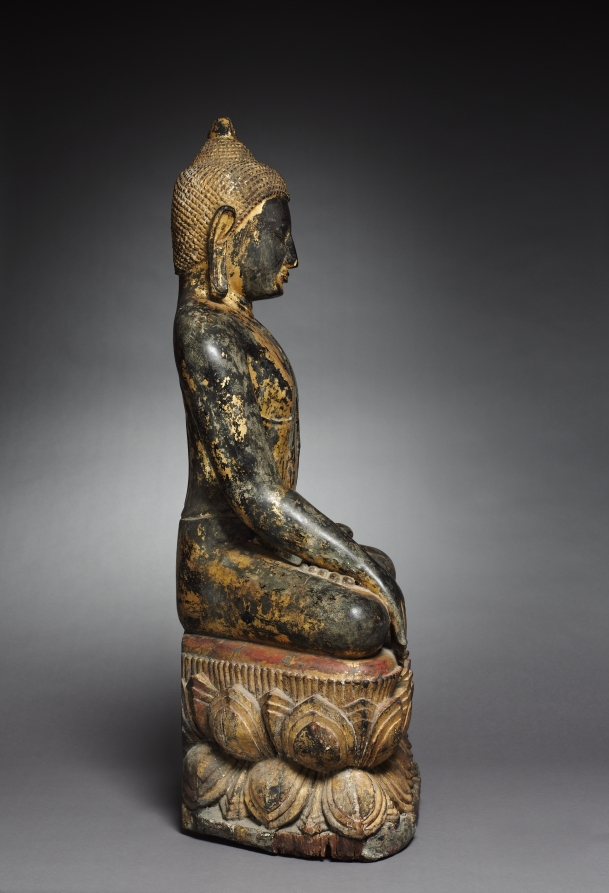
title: Seated Buddha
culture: Burma (Myanmar)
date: 1100s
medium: Gilt lacquer on solid wood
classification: Lacquer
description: This rare image of the historical Buddha Shakyamuni is shown seated with crossed legs in the position of meditation. His left hand rests on his lap, referring to his meditation under the Bodhi tree, and his right hand is in the earth-touching gesture—calling the earth to witness his enlightenment. The Buddha sits on a double lotus pedestal that indicates the presence of a transcendent being. The sculptural style is typical of sculptures made at the Buddhist site of Pagan. Sculptures such as this were installed in niches in an interior passage of a temple. As is typical of Burmese works, this sculpture was carved from a solid piece of wood. Its surface was covered in black lacquer and then gilded; a great deal of the gilding remains intact. Because lacquer is an easily perishable material, works of this type and size are exceedingly rare; this sculpture is one of the best extant examples.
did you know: The parallel lines with heart-shaped ends near the Buddha's ankles are the rippling pleats of his garment's hem.